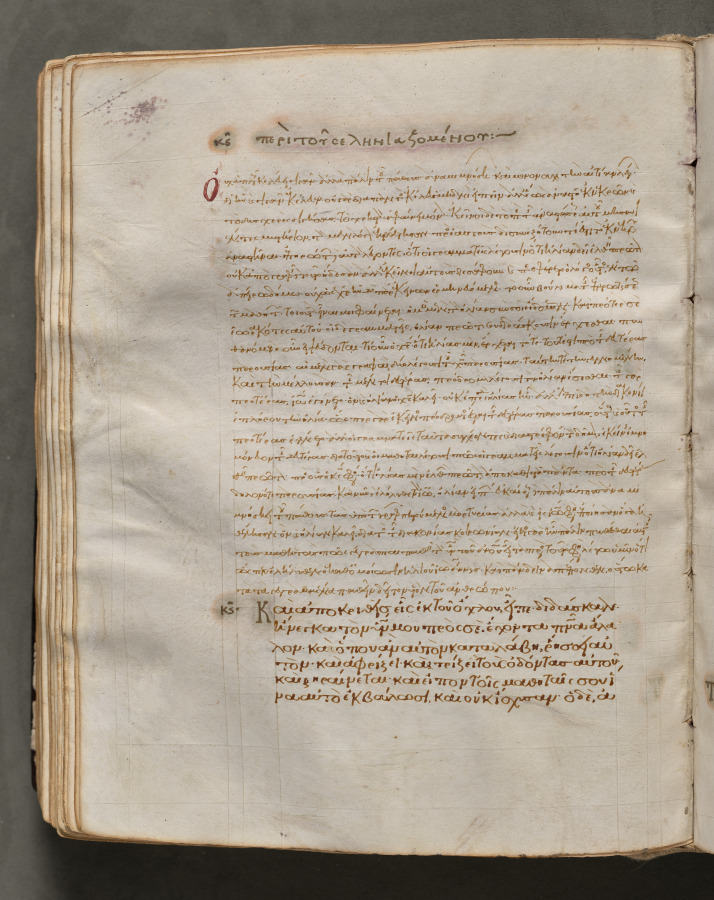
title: Text, folio 163 (verso), from a Gospel Book with Commentaries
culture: Byzantium, Constantinople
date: c. 1000–1100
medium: ink, tempera, and gold on vellum; leather binding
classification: Bound Volume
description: Each of the four gospels in this book opens on a page with brilliantly illuminated borders depicting the author of the text as well as birds-principally peacocks, symbols of the immortality of the soul-and fountains, representing the fountain of life and the salvation of the soul. This volume consists of 428 leaves with texts in Greek. Its level of sophistication suggests that it was probably written and decorated in a monastery in Constantinople.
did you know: Gospel Books were carried in procession through Byzantine churches.